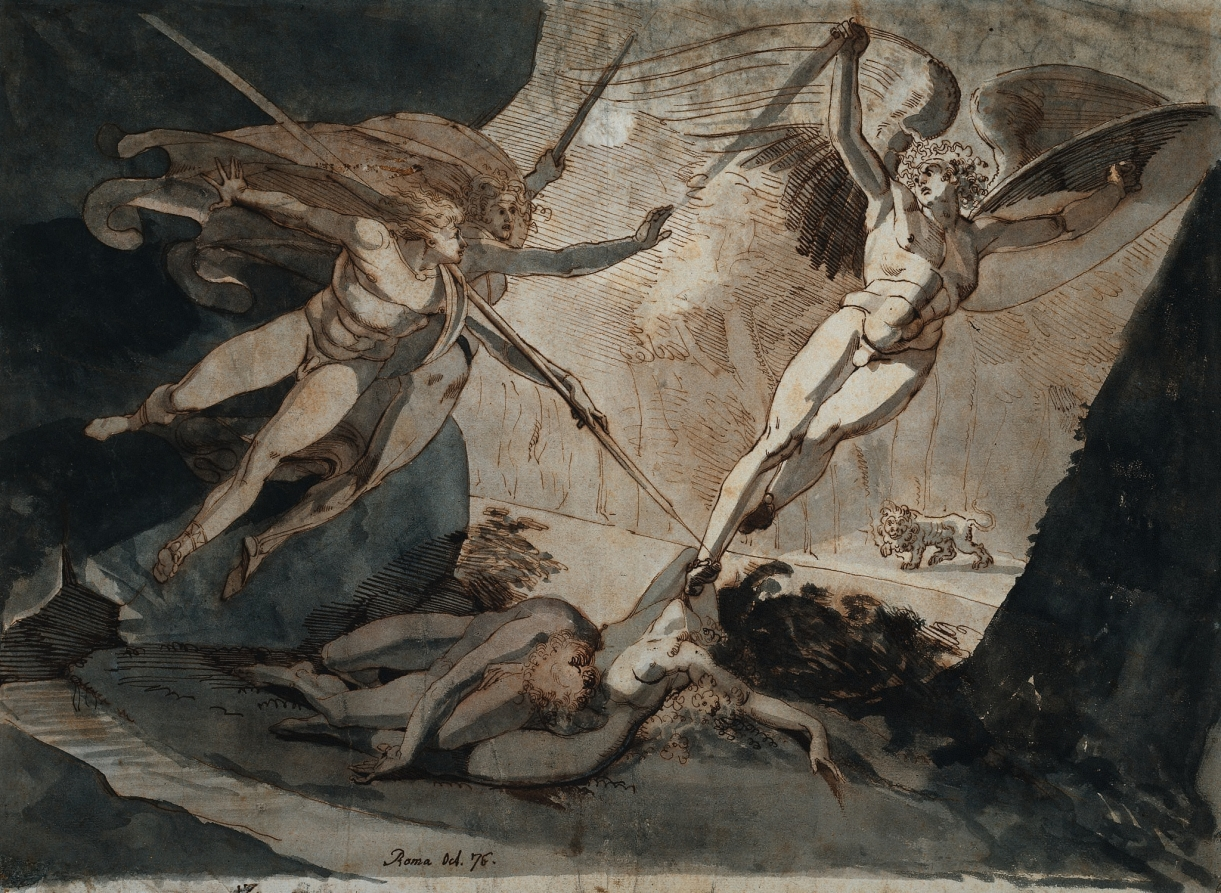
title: Satan Starts from the Touch of Ithuriel's Spear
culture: England, 18th century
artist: Henry Fuseli (Swiss, 1741–1825)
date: 1776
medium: pen and brown ink and brush and gray wash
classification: Drawing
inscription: inscribed, at lower center, in brown ink: Roma Oct. 76; at lower left, in brown ink: 17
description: Henry Fuseli's lifelong interest in the work of the English poet John Milton (1608-1674) inspired many drawings that interpreted passages from Milton's epic poem Paradise Lost (1667). This early example illustrates the moment when the angels Ithuriel and Zephon discover Satan disguised as a toad in the bower where Adam and Eve are sleeping. Ithuriel forces Satan to reveal himself by prodding him with a spear. The lion in the background alludes to an earlier passage in the poem, when Satan takes on the shape of the beast in order to spy on the couple.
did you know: This drawing is one of three almost identical drawings depicting the same scene from Paradise Lost; the other sheets are in the collections of the National Gallery, Stockholm, and the British Museum, London.